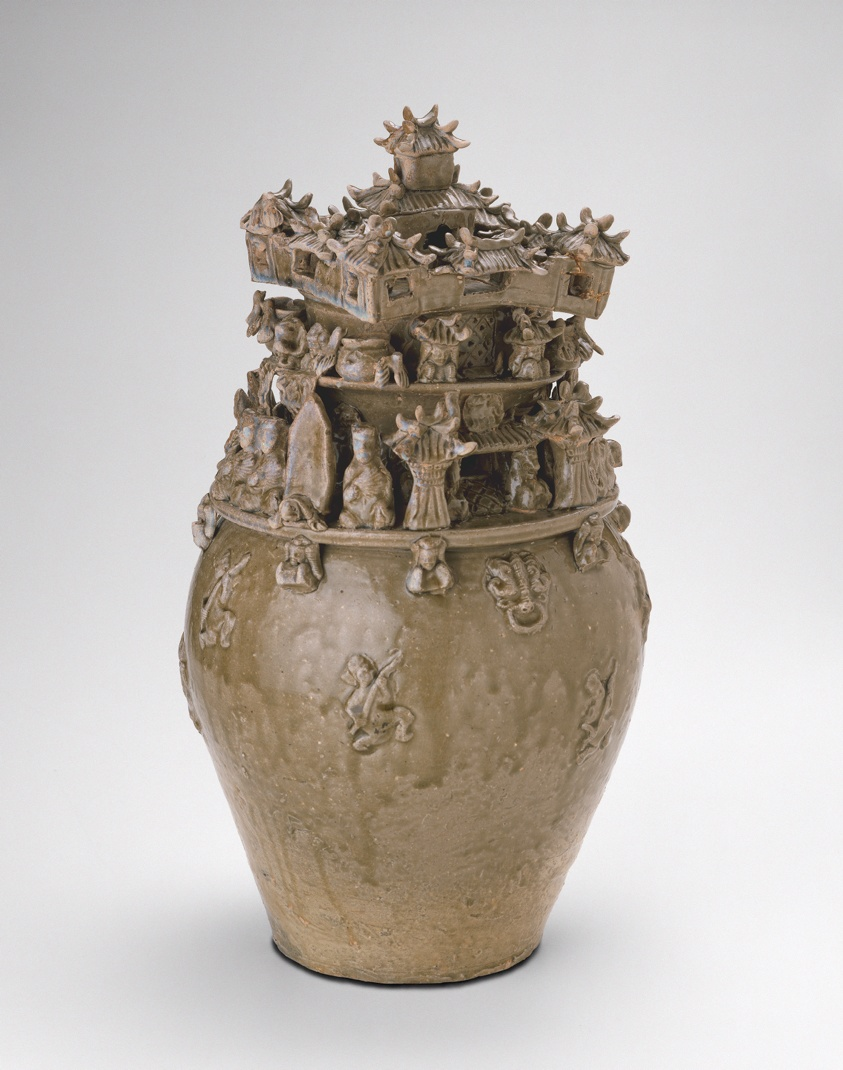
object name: Religious/Ritual Object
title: Funerary Urn (Hunping)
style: Chinese (culture or style), western jin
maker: China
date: Western Jin dynasty (A.D. 265–316), late 3rd century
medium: Stoneware with olive-green glaze and molded and applied decoration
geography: China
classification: stoneware; ceramics; asian art; ritual objects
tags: funerary art, buildings, figures (representations), animals, Buddhism, religion, Buddha